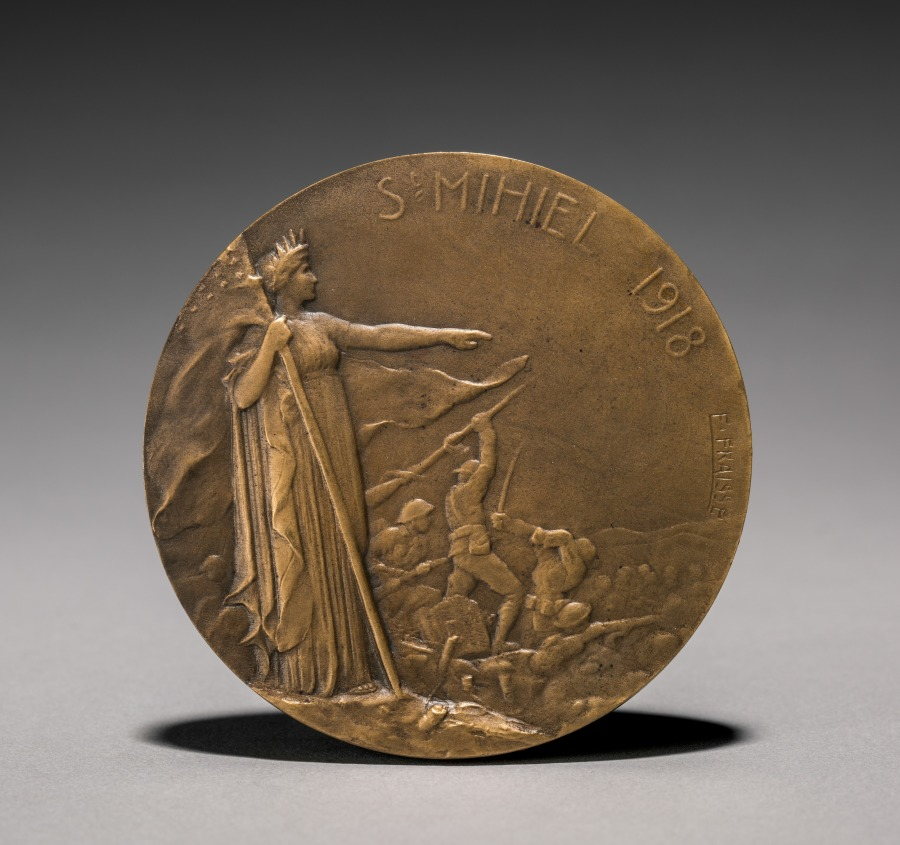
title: Medal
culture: France, 20th century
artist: Edouard Fraisse (French, 1880–1945)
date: 1900s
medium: bronze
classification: Metalwork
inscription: obverse - "St. Mihiel 1918." reverse - "12 - 13 Sept. 1918"; in French and English: "The American Troops operating victoriously in the St. Mihiel secteur broke the resistance of the enemy and captured 13,300 prisoners."